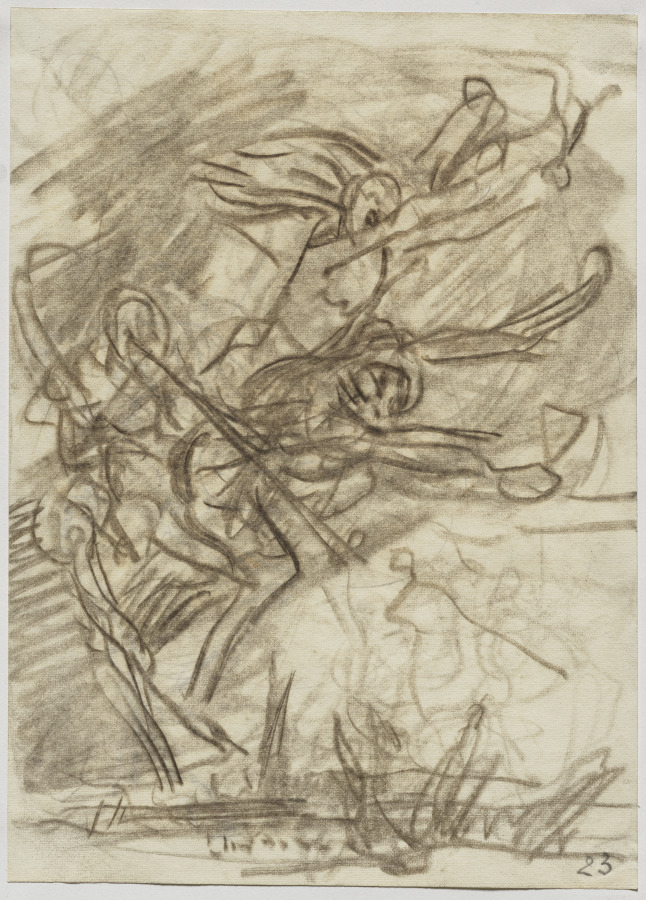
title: La Mort et les Passions fondant sur la terre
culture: France, 20th century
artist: Auguste Louis Lepère (French, 1849–1918)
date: 1914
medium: black crayon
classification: Drawing